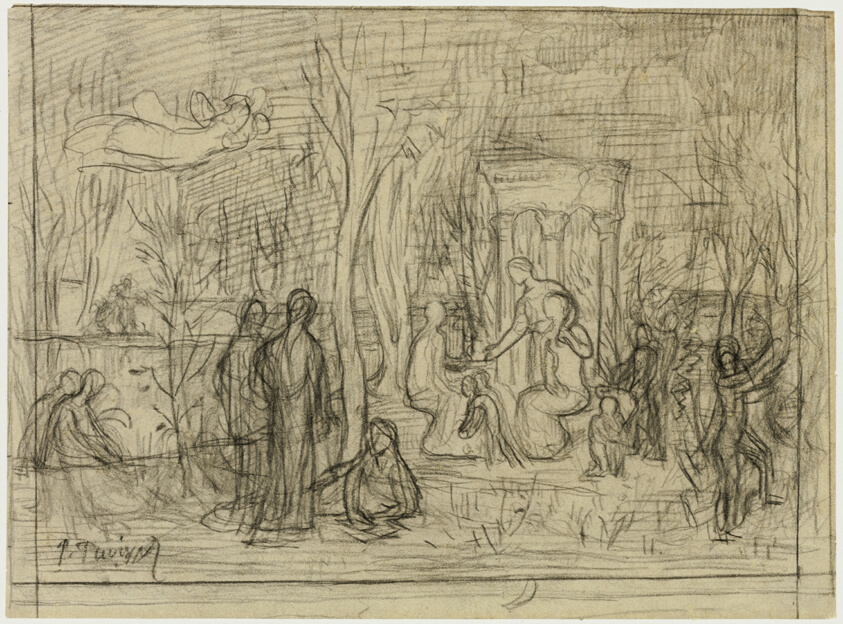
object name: Drawing and Watercolor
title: Compositional study for The Sacred Grove, Beloved of the Arts and the Muses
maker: Pierre Puvis de Chavannes (French, 1824-1898)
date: 1883/84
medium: Black chalk on tan wove tracing paper, laid down on ivory wove paper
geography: France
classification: chalk; paper; prints and drawing